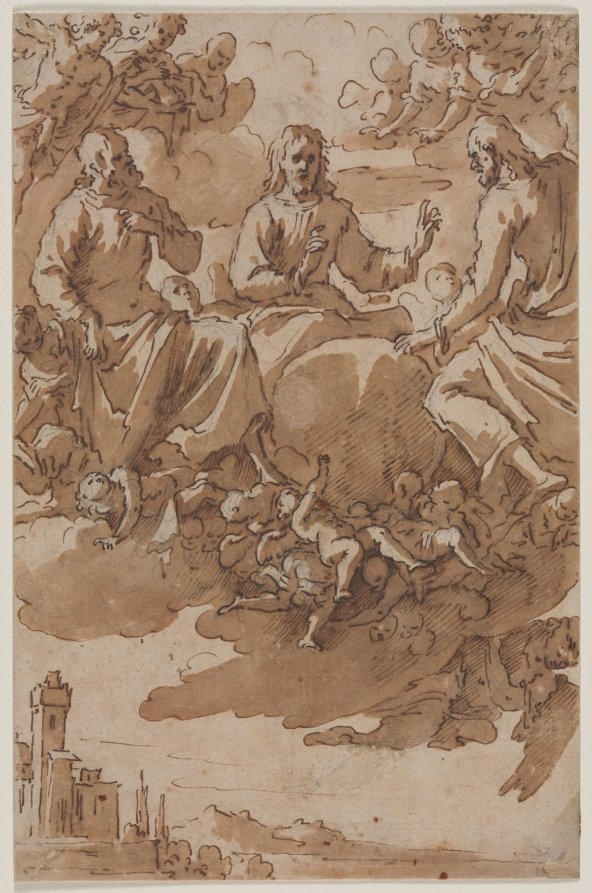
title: Christ in Glory with Two Saints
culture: Italy, 17th century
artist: Marcantonio Bassetti (Italian, 1586–1630)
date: first third 17th century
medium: pen and brown ink and brush and brown wash with graphite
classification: Drawing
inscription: VERSO OF SECONDARY SUPPORT, upper left, in graphite: 10°° ; upper center, in graphite: 66 [circled, crossed out in blue pencil ; upper right, in blue pencil: #44 ; center, in graphite: [Urr?] / [Vach?] [underlined] 826 / [120 x ?] / Palma Giovane [underlined] / 1544-1628 [crossed out]; lower left, in graphite 87/14 [crossed out] ; lower center, in graphite: 10/24/57 / See Albertina Cat. / #208. (p. 105) ; lower right, in graphite: 709 [crossed out]